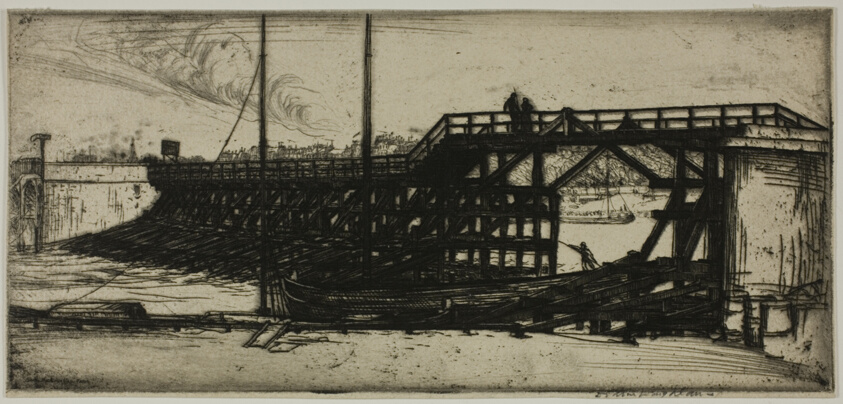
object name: Print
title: L'Estacade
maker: Donald Shaw MacLaughlan (American, born Canada, 1876-1938)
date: 1899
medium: Etching in black on cream laid paper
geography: United States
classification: etching; print; prints and drawing